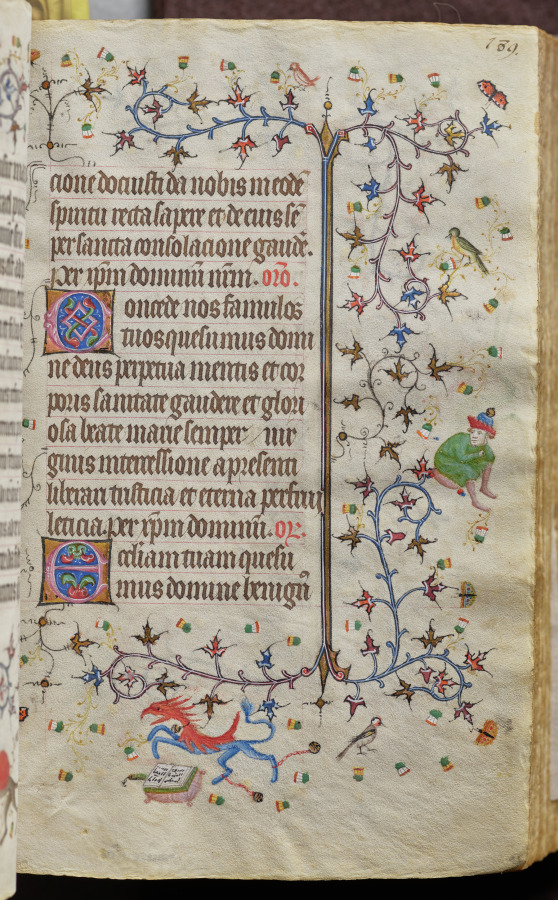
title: Hours of Charles the Noble, King of Navarre (1361-1425): fol. 95r, Text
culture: France, Paris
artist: Master of the Brussels Initials and Associates (French)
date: c. 1405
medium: ink, tempera, and gold on vellum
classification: Bound Volume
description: This precious volume was obviously highly prized by its owner, the French-born King of Navarre, who had his coat of arms painted on no less than twenty folios. Rather than directly commissioning this manuscript from a specific workshop, it seems that Charles the Noble acquired his book of hours -- perhaps ready-made for the luxury market -- while on a trip to Paris in 1404-05. A collaborative effort, six painting styles are evidenced within the pages of this codex, those of two Italians, two Frenchmen, and two Netherlanders. The painter who was responsible for the planning and decoration of the book, and who produced seventeen of the large miniatures, was a Bolognese artist known as the Master of the Brussels Initials. His principal assistant, responsible for most of the borders, was a Florentine who signed his name "Zecho" da Firenze on folio 208 verso.